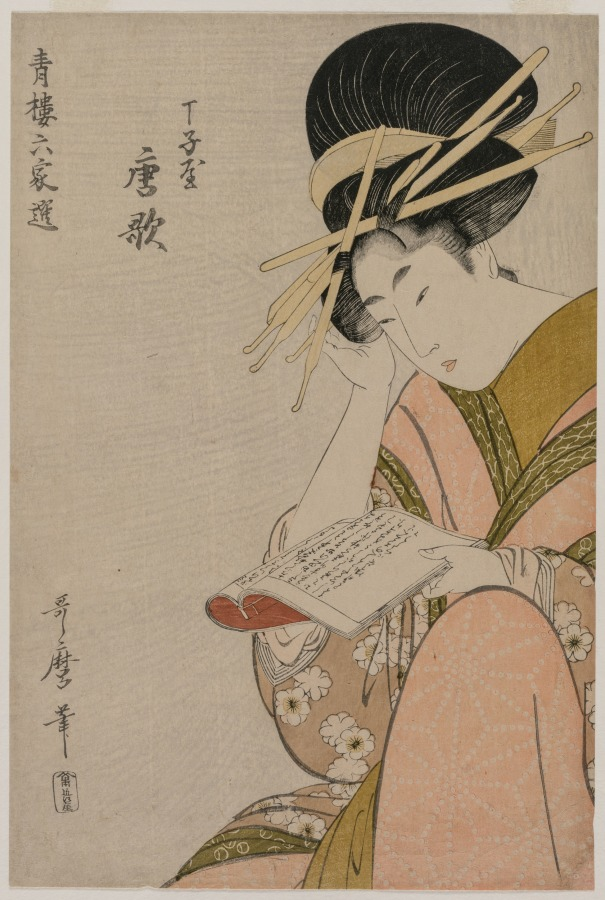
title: The Courtesan Karauta of Chojiya Reading a Book (from the series Six Authors of the Green Houses)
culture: Japan, Edo period (1615–1868)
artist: Kitagawa Utamaro (Japanese, c. 1754–1806)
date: late 1790s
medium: color woodblock print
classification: Print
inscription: Signature: Utamaro hitsu.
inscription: Publisher: Ōmiya Gonkurō (Ōmiya, emblem).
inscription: purple "Outamaro" stamp on verso